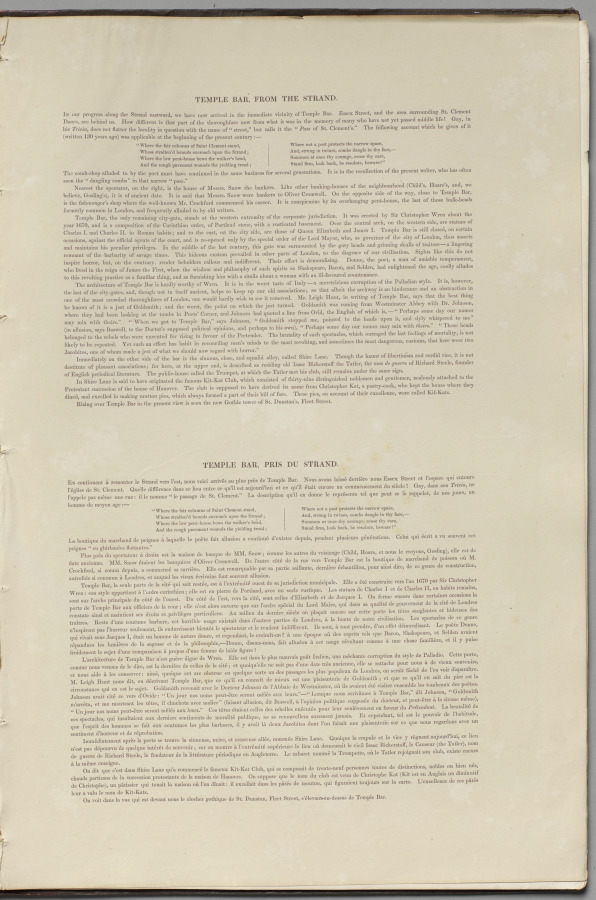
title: London As It Is: Temple Bar, from the Strand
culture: England, 19th century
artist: Thomas Shotter Boys (British, 1803–1874)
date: 1842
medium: lithograph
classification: Bound Volume